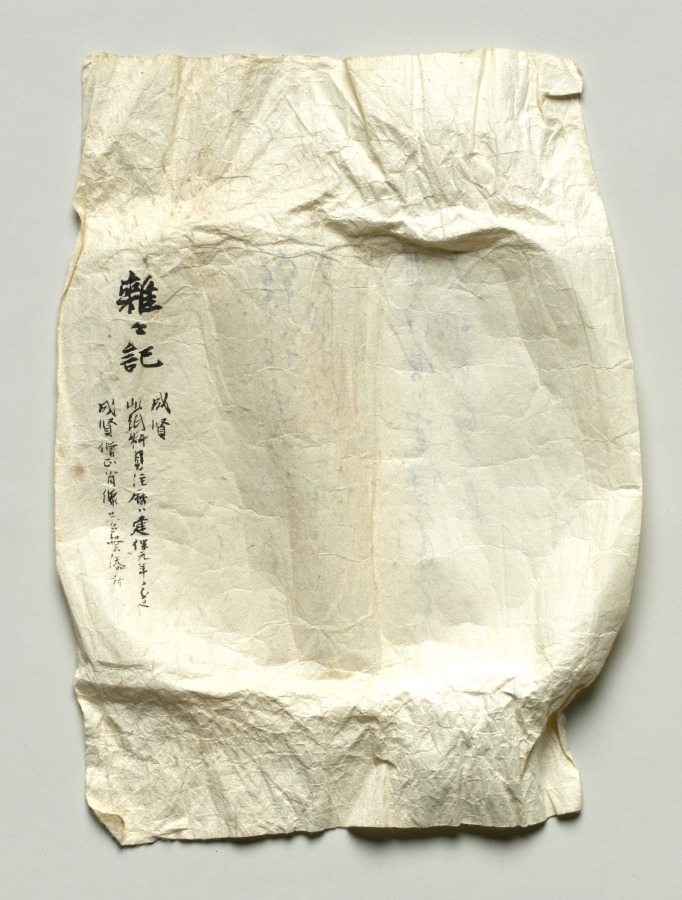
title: Scroll of Miscellaneous Notes written on a Calendar by Priest Seigen (recto)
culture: Japan, Kamakura period (1185–1333)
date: c. 1200–1231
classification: Manuscript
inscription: bears miscellaneous notes written by Priest Seigen.